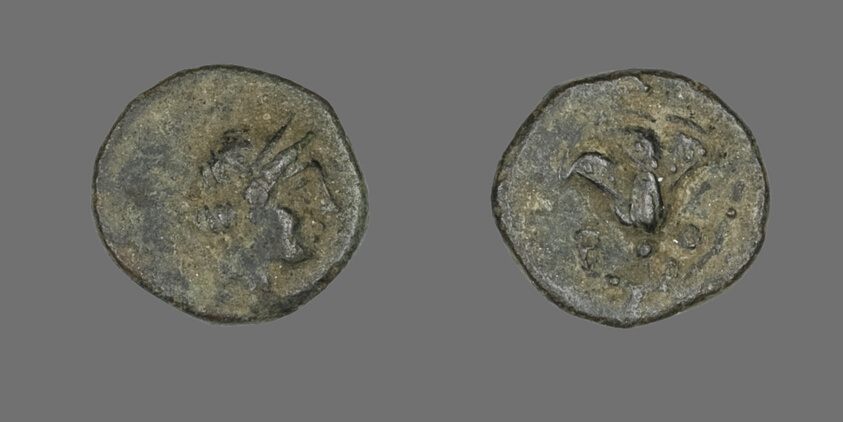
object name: Coin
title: Coin Depicting the Goddess Rhodos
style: greek, ancient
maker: Greek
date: 333-304 BCE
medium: Bronze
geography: Ancient Greece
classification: coin; ancient art